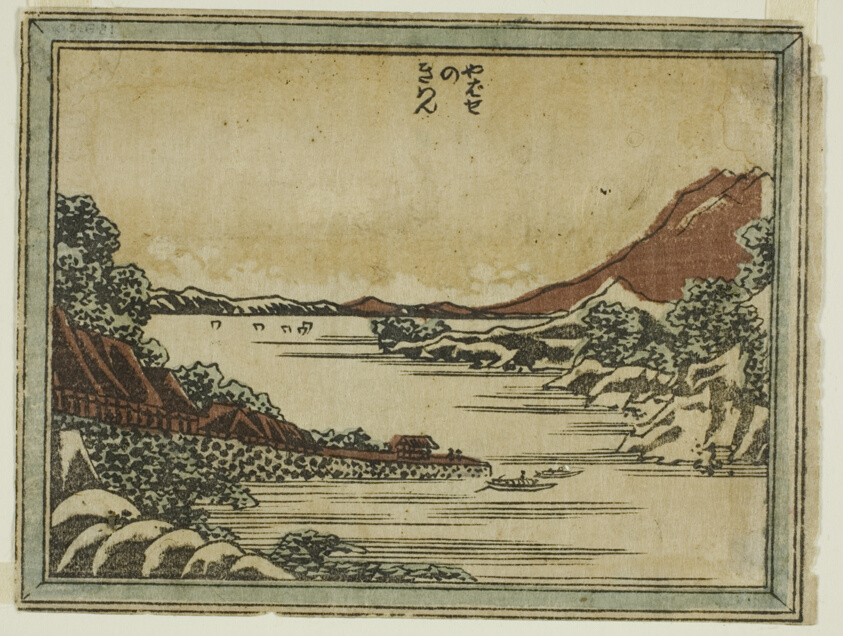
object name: Print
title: Returning Sails at Yabase (Yabase no kiban), from the series Eight Views of Omi in Etching Style (Doban Omi hakkei)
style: Japanese (culture or style)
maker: Katsushika Hokusai 葛飾 北斎; Japanese, 1760-1849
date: 1804/16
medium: Color woodblock print; horizontal koban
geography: Japan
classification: woodblock print; print; asian art